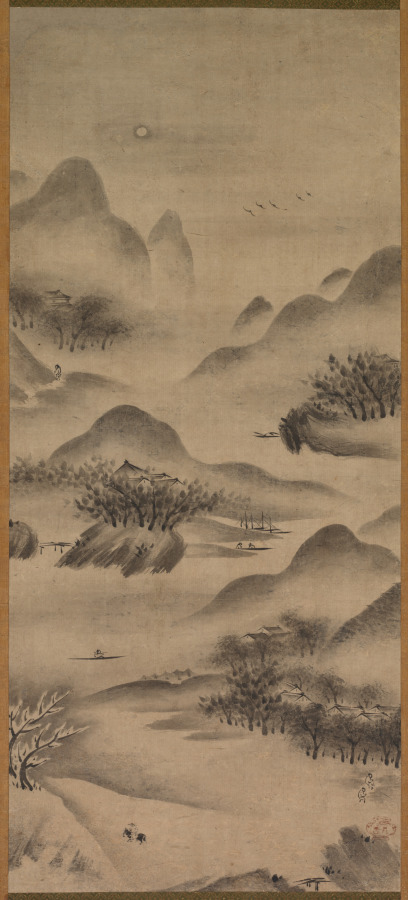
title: Landscape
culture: Japan, Edo period (1615–1868)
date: early 1600s to mid-1800s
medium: hanging scroll; ink on paper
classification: Painting